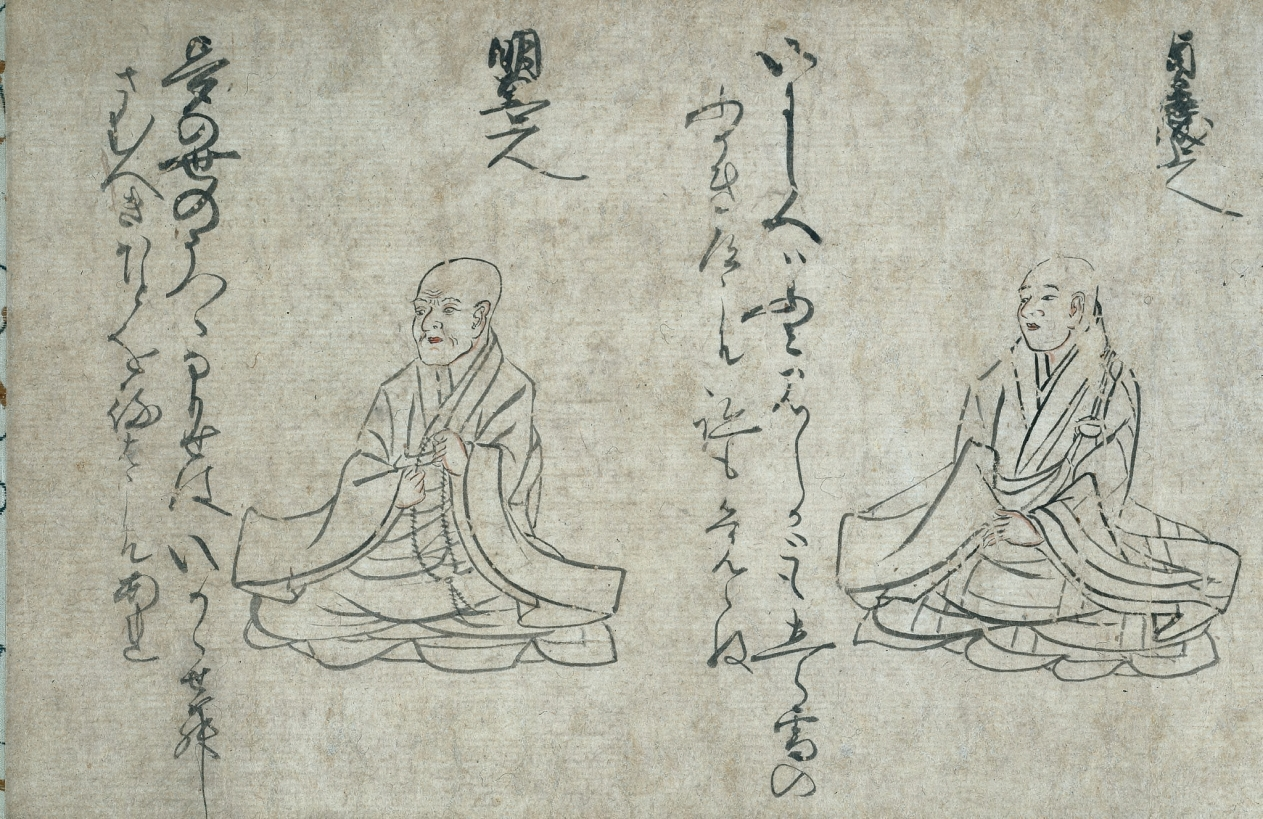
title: Thirty-Six Poetic Immortals of the Buddhist Clergy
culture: Japan, Muromachi period (1392–1573)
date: late 1300s–1400s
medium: Fragment of a handscroll remounted as a hanging scroll; ink and slight color on paper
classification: Painting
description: Handscrolls depicting eminent poets and their poems is a classic Japanese painting genre. This fragment is the end of a scroll, the beginning of which survives in the Tokyo National Museum. It has a preface stating it is based on a selection of 36 monks paired with their waka (31-syllable poems) made by Eikai (1278–1347) from Kashūji temple in the year of his death. These two portraits are of Jōkei (1155–1212) and Myōe (1173–1232), to the right and left, respectively.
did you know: The monk Myōe kept a diary of his dreams that survives in fragments today.